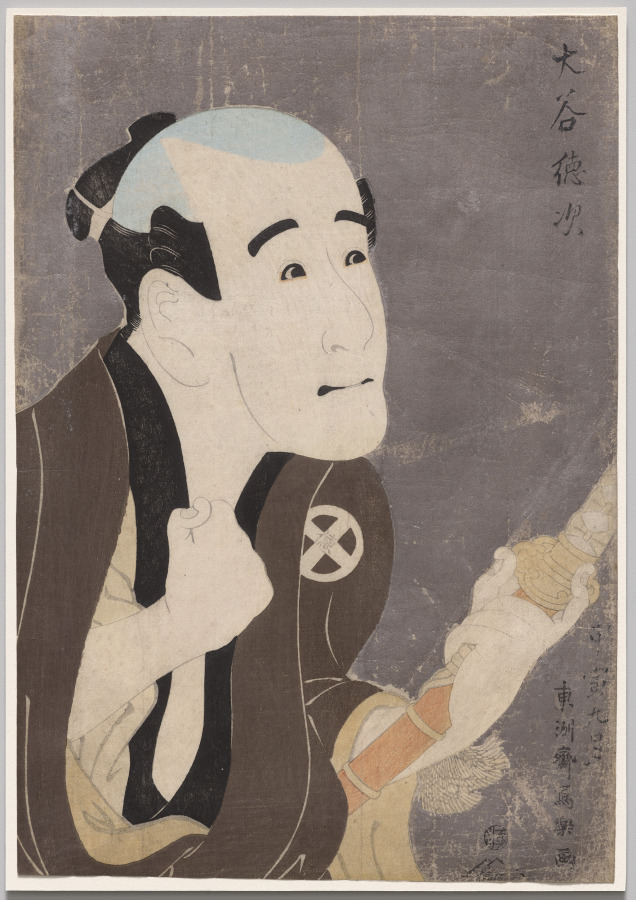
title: Otani Tokuji I as the Retainer Sodesuke in "Flowering Irises: A Soga Vendetta of the Bunroku Era"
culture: Japan, Edo period (1615–1868)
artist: Tōshūsai Sharaku (Japanese, active 1794–95)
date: 1794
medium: color woodblock print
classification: Print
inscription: Signature: Toshusai Sharaku ga (in lower right corner). Publisher: Tsutaya Juzaburo (emblem). Censorship Seal: kiwame.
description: Ōtani Tokuji I (1756–1808) portrays a servant in a play that follows two brothers as they pursue a villain who murdered their father and older brother and who stole their family’s secret scroll. This design belongs to a category of Japanese prints called “actor images” (yakusha-e or 役者絵). They were collected by fans of popular Kabuki actors. Kabuki is a kind of entertainment that got its start in the early Edo period, evolving from dance performances with simple storylines to long plays with complex plots, elaborate sets, and full musical accompaniments. Performers wear showy costumes and heavy makeup and strike poses called mie at critical moments in the narrative. Dialogue is spoken in a stylized way that resembles singing.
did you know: The clenched fist and mouth express the character’s determination.